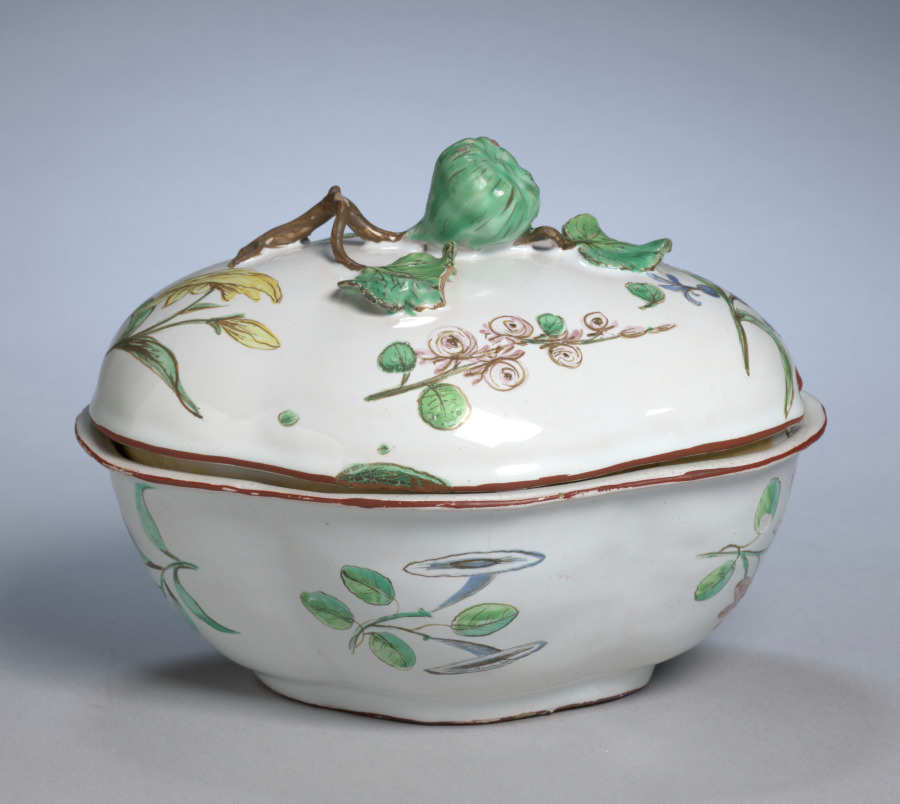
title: Sugar Basin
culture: France, 18th century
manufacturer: Sceaux Factory (French, active 1748–66)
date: c. 1750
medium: faience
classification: Ceramic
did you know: In medieval Italian churches, painted altarpieces served as a focal point for worshippers during the rituals of faith. The figures of Jesus, Mary, and eight saints are framed by a golden background that would have glistened in the flickering candlelight of the church.